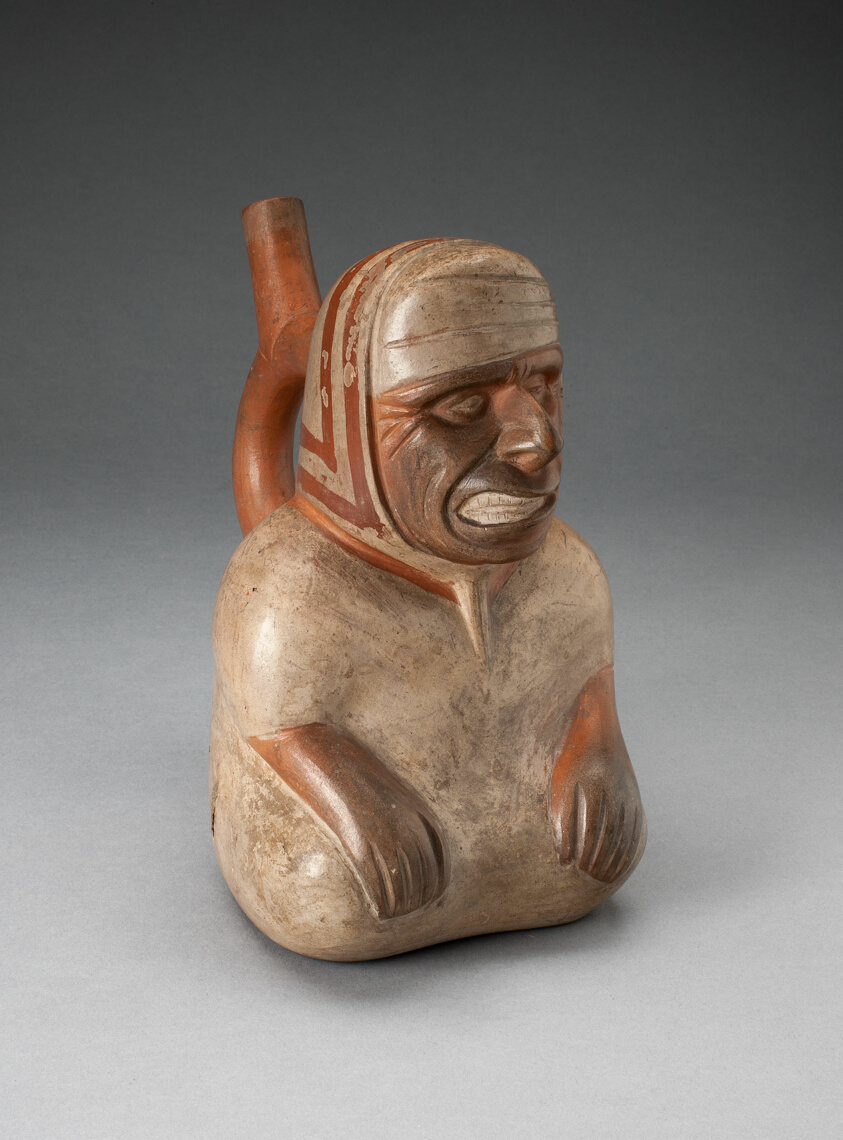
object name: Vessel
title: Portrait Vessel of a Blind Figure with Distorted Mouth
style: moche, mochica, early intermediate period, Pre-Columbian, americas, Arts of the Americas, andean, andes, south american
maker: Moche (North coast, Peru)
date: 100 BCE–500 CE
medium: Ceramic and pigment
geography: Peruvian North Coast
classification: earthenware; art of the americas; ceramics; vessel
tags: people, portraits